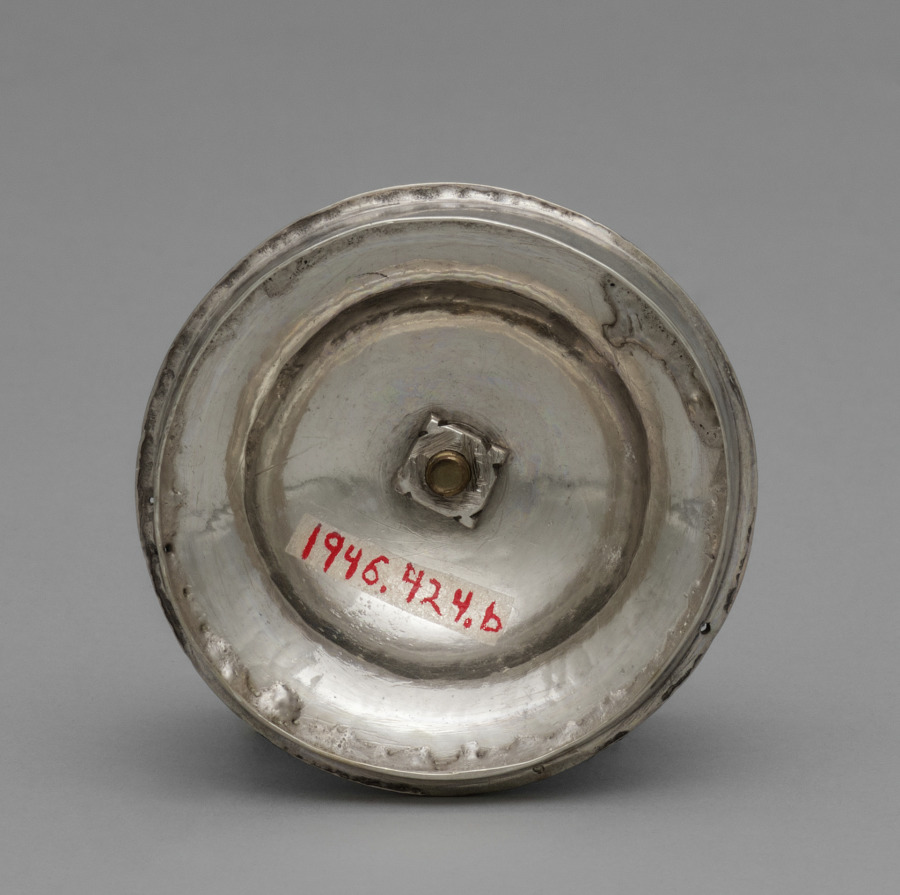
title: Teapot (lid)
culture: America, Pennsylvania, Philadelphia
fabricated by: John David (American, 1736–1793)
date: c. 1790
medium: silver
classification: Silver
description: This teapot may have belonged to Dr. Enoch F. Edwards, George Washington’s personal physician.